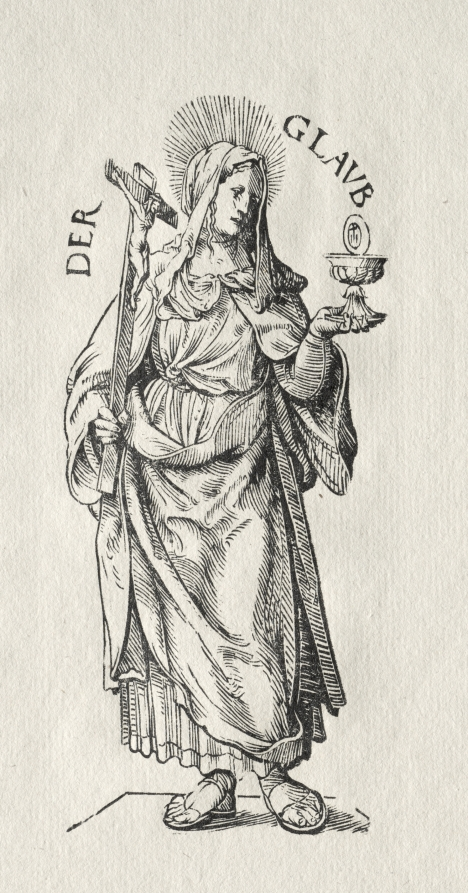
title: The Seven Virtues: Faith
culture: Germany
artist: Hans Burgkmair (German, 1473–1531)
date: 1510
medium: woodcut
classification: Print